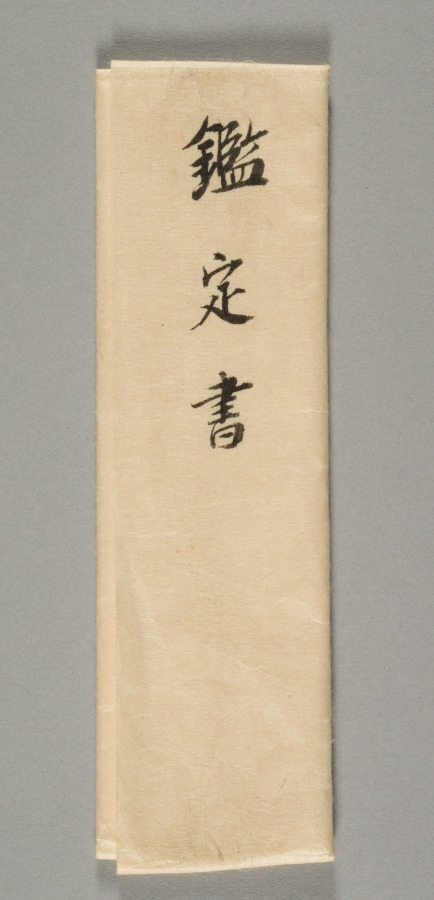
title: Monju as a Child (Chigo Monju)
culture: Japan, Muromachi period (1392–1573)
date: early 1400s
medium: hanging scroll; ink, color, and gold on silk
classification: Painting